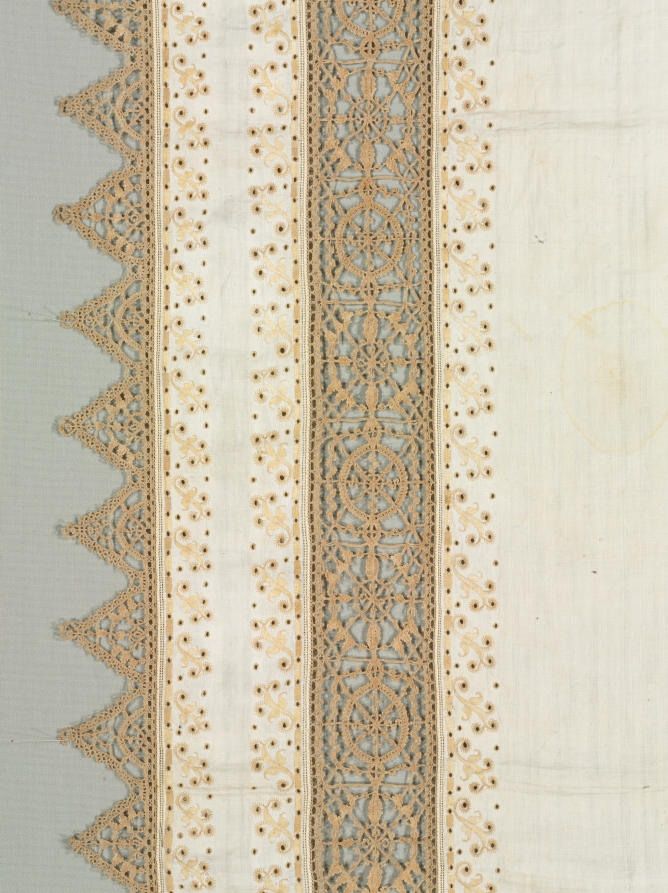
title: Cloth for a table ?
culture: Italy, Sicily, 1550-1599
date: 1550–1599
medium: Linen: bobbin lace (needle lace design)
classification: Lace